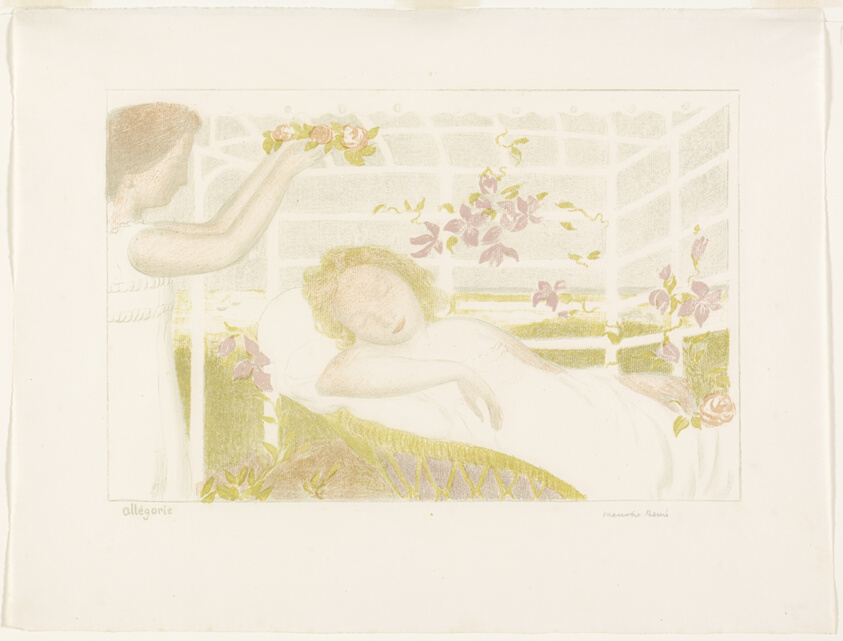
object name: Print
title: Allegory, plate one from Love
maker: Maurice Denis (French, 1870-1943); published by Ambroise Vollard (French, 1867-1939)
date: 1898, published 1899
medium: Lithograph in green, light gray, pink, and purple on light ivory wove paper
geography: France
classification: lithograph; print; prints and drawing